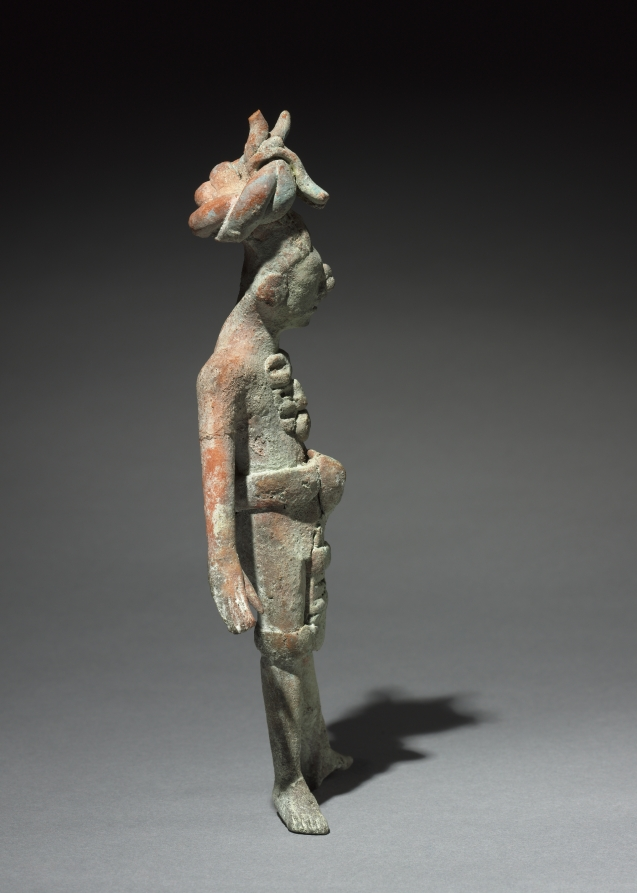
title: Jaina Figure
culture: Maya, Late Classic, 7th-8th Century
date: 600s-700s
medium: terracotta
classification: Sculpture